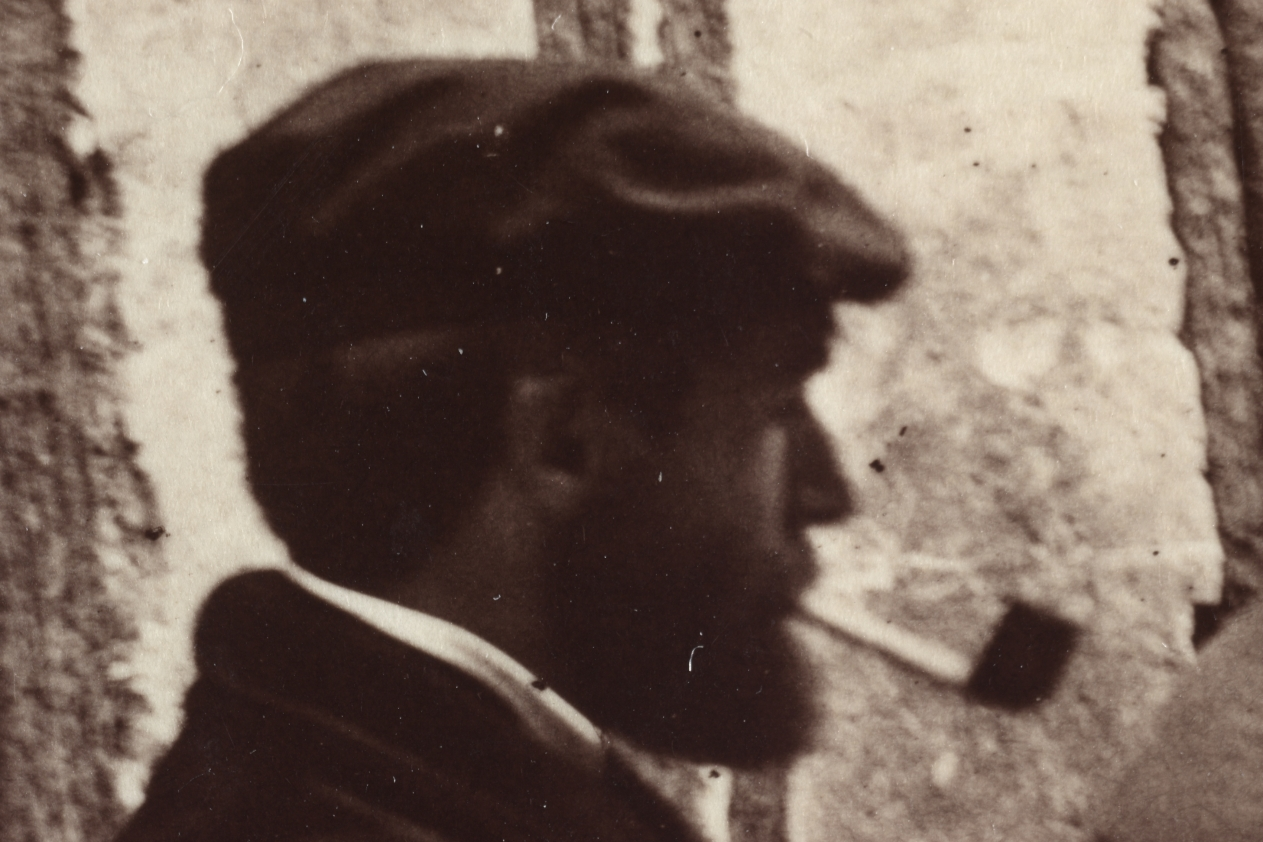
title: Courtyard with Painters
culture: France(?), 19th century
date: late 1860s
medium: albumen print from wet collodion negative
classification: Photograph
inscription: in pencil on reverse: Les Andeys (?) Cour & hotel, G713 and 695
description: This photographer inventively expanded the medium to create a rare example of both early genre (everyday life) photography and documentation of artists at work. The collodion negative captured a wealth of detail. The French village courtyard bustles with activity-the artist in the foreground hugs a squirming child and chats with his wife; a group of peasant women in the background heave huge bundles of laundry about in carts and baskets; and an innkeeper poses proudly for the camera outside his ivy-covered establishment. The diagonals of the sloping roofs and the textures of tiles, wood, and stone enhance the composition's visual interest. A luminous glow, absorbed by open canvas umbrellas, pervades the center of the scene.